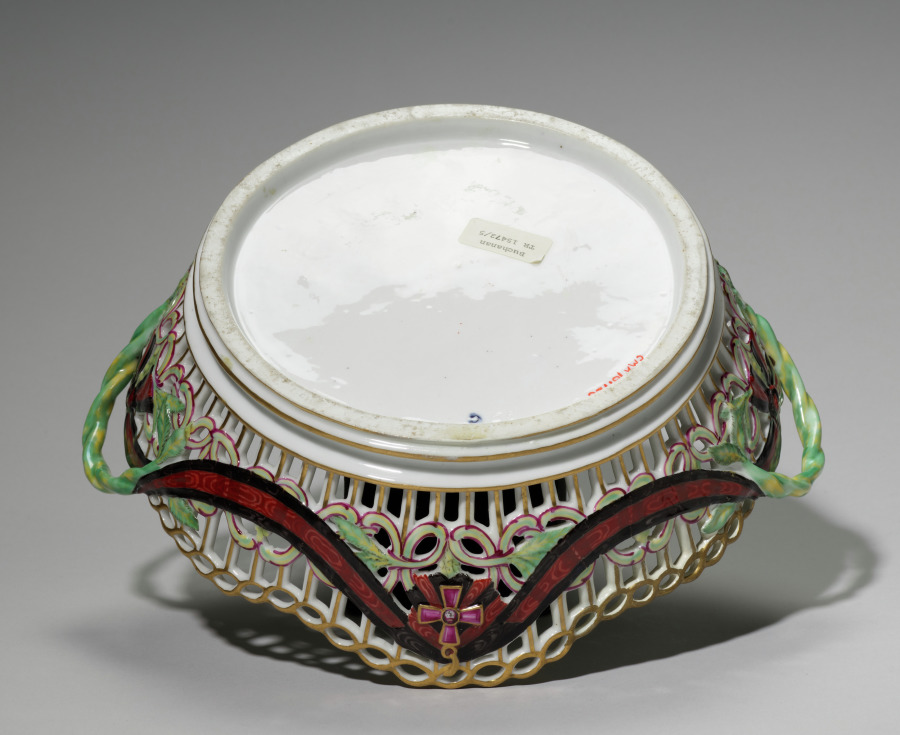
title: Fruit Basket (Corbeille)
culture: Russia, Moscow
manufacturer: Gardner Factory (Russian)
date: c. 1783–85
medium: porcelain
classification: Ceramic